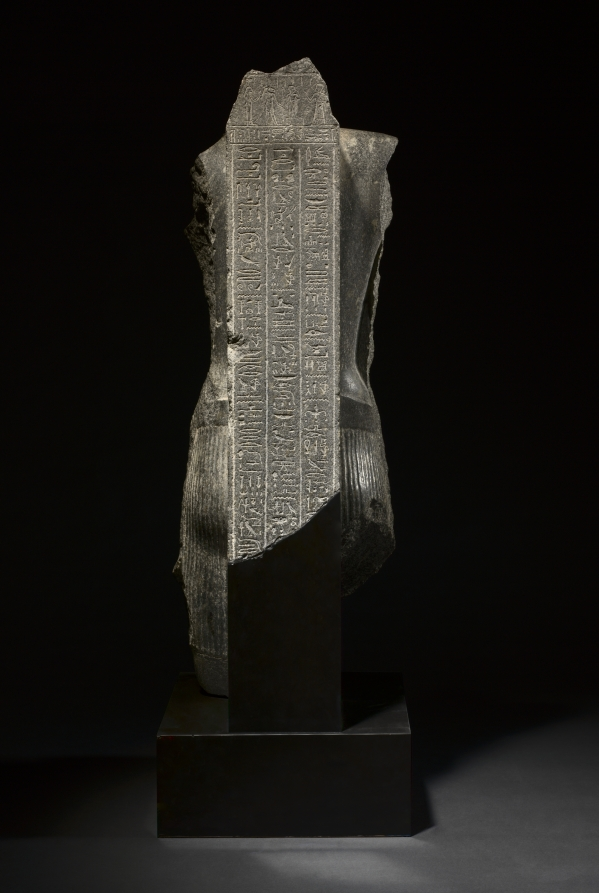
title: Torso of Amenpayom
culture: Egypt, Greco-Roman period (332 BCE–395 CE), Ptolemaic dynasty (305–30 BCE)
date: probably 200–100 BCE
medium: granodiorite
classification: Sculpture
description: This magnificent life-sized torso is inscribed for Amenpayom, the great army general of the district of Mendes in the Nile Delta. By the end of the Ptolemaic dynasty (305-30 BC) when this statue was made, the Egyptians could draw on 3,000 years of expertise carving hard stone. Enough remains to show that Amenpayom was represented in the traditional pose for men: left leg striding forward, arms at his sides, and supported by a back pillar. The subtle, masterful treatment of the undulating musculature and meticulous, flawless polish are hallmarks of this period, when Egyptian artists reveled in the natural beauty of the human form.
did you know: On the back Amenpayom is depicted again worshiping the gods of Mendes, Harpocrates, Banebjedet, and Hatmehit.